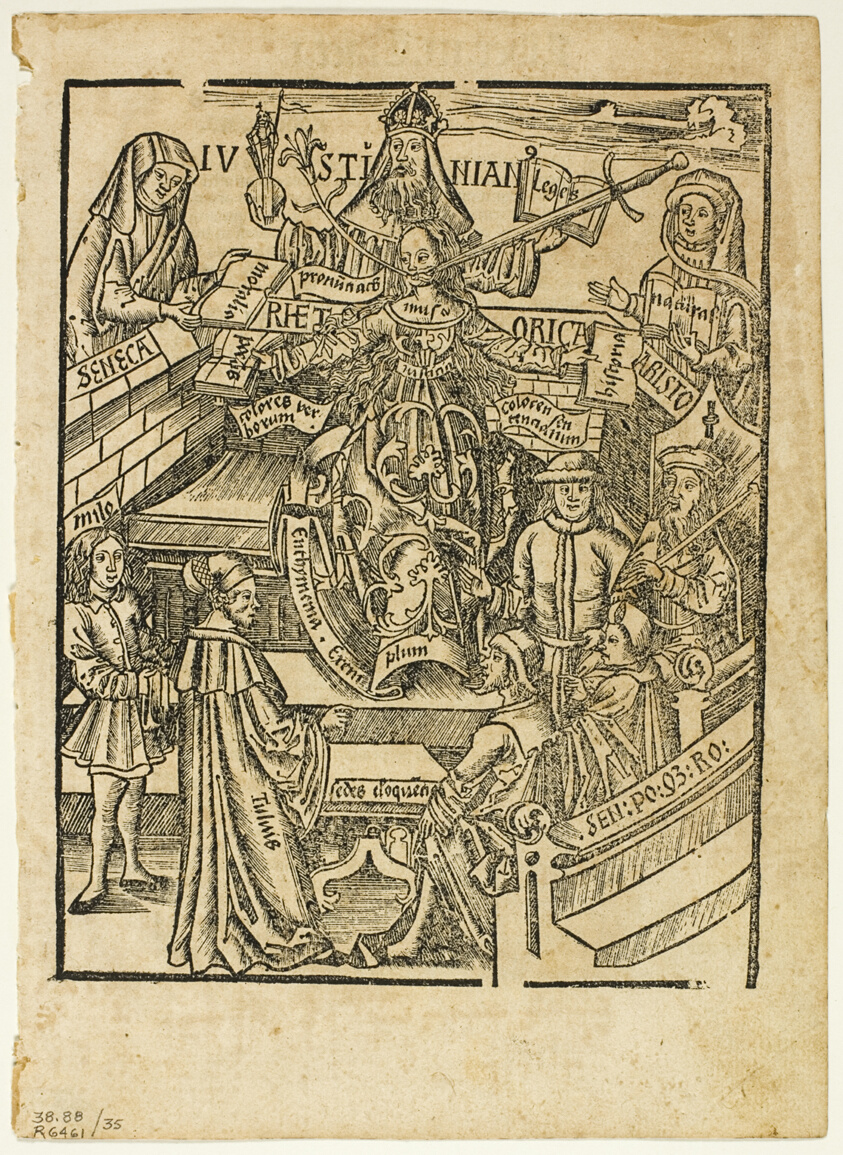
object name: Print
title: Illustration from Margarita philosophica, plate 35 from Woodcuts from Books of the XVI Century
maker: Unknown Artist (German, 16th century); assembled by Max Geisberg (Swiss, 1875-1943)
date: 1517, assembled into portfolio 1937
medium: Woodcut on paper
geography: Germany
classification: woodcut; print; prints and drawing